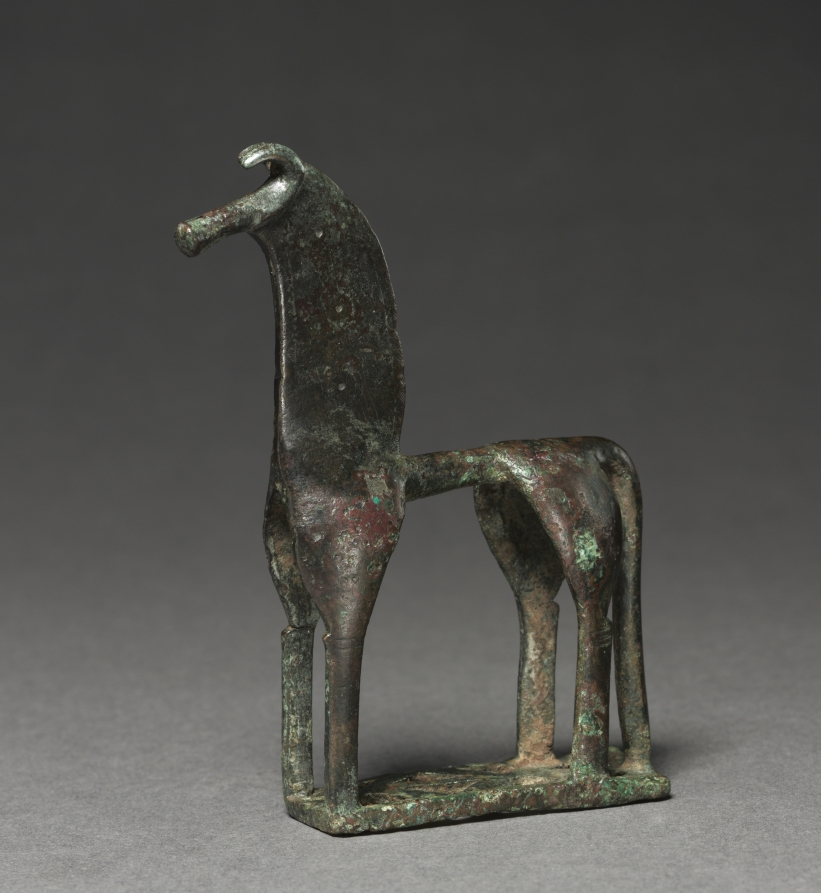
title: Statuette of a Horse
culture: Greek, Geometric, probably Corinthian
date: 750–700 BCE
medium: bronze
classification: Sculpture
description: Cast using the lost-wax process, this bronze horse with perforated stand is conceived in profile, its balanced and stylized forms designed for clarity and legibility. Among thousands of bronze animal figurines produced across the Greek world in the Geometric period, this example stands out for its intact condition and large size. Although lacking a known findspot, its form suggests that it may have been produced in a Corinthian workshop.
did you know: The triangular perforations in this statuette’s base give an impression of translucence, perhaps alluding to water.